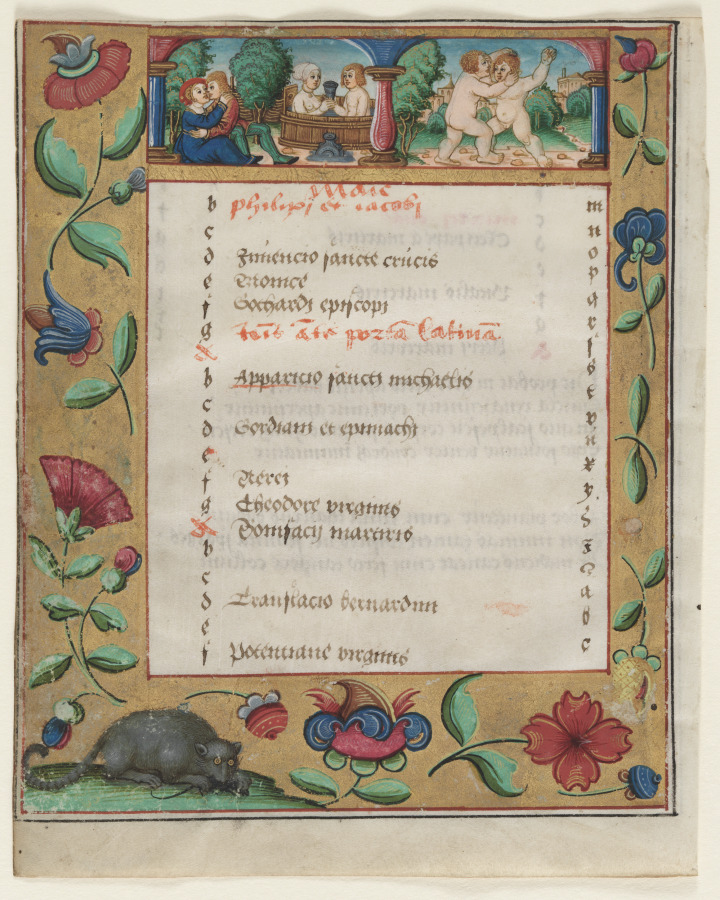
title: Leaf from a Psalter and Prayerbook: Calendar Page with Labors (recto)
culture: Germany, Hildesheim (?), 16th century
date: c. 1524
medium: ink, tempera and liquid gold on vellum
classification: Manuscript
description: These three leaves represent the charming, intricate decoration found throughout the parent volume, its leaves now dispersed. Virtually every border, recto and verso, was decorated with liquid gold and highlighted with a variety of flowers, fruits, and vegetables—carnations, thistles, roses, violets, peas, melons—as well as cornucopias, satyrs, masks, insects, birds, etc. The decoration is particularly charming because of the little vignettes within the borders. These motifs depict a girl kneading bread, a cook ladling soup, a goose nibbling grapes off a vine, and a satyr with a horn. Such details would have been a sumptuous delight to the original owner. This was a highly personalized volume, apparently written and illuminated in North Germany. The prominent mention of Saint Godehard (died 1038), Bishop of Hildesheim, in the original manuscript suggests that it was produced in that city.